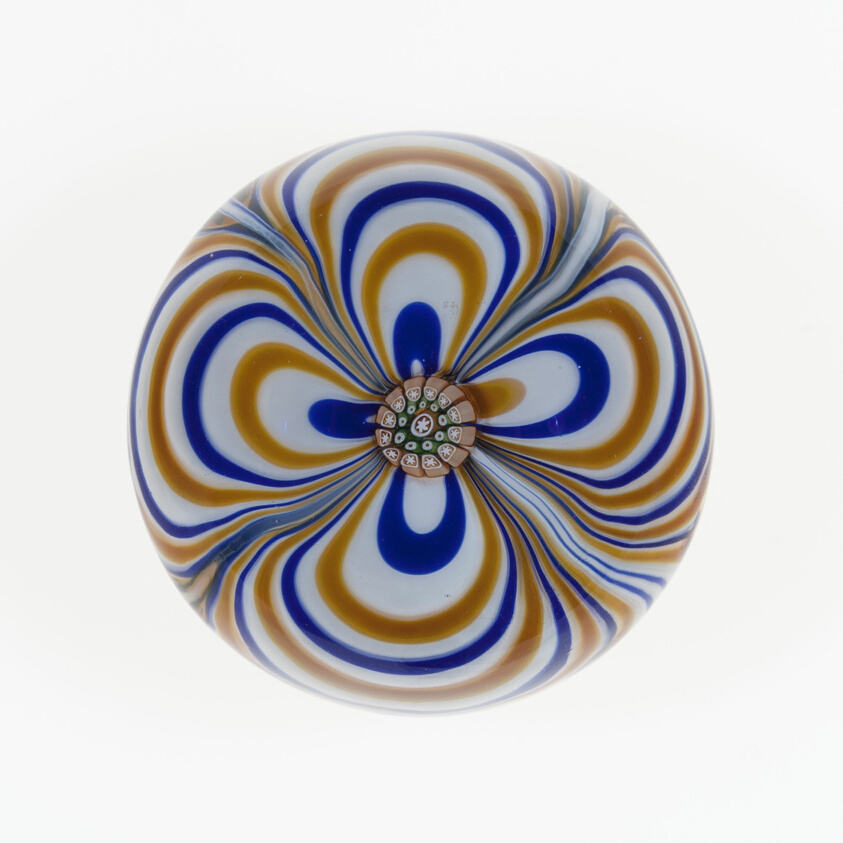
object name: Glass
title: Paperweight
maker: Saint-Louis Glassworks (Cristalleries de Saint-Louis); Lorraine, France, founded 1586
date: c. 1845–60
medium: Glass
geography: Saint-Louis-lès-Bitche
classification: paperweight; glass